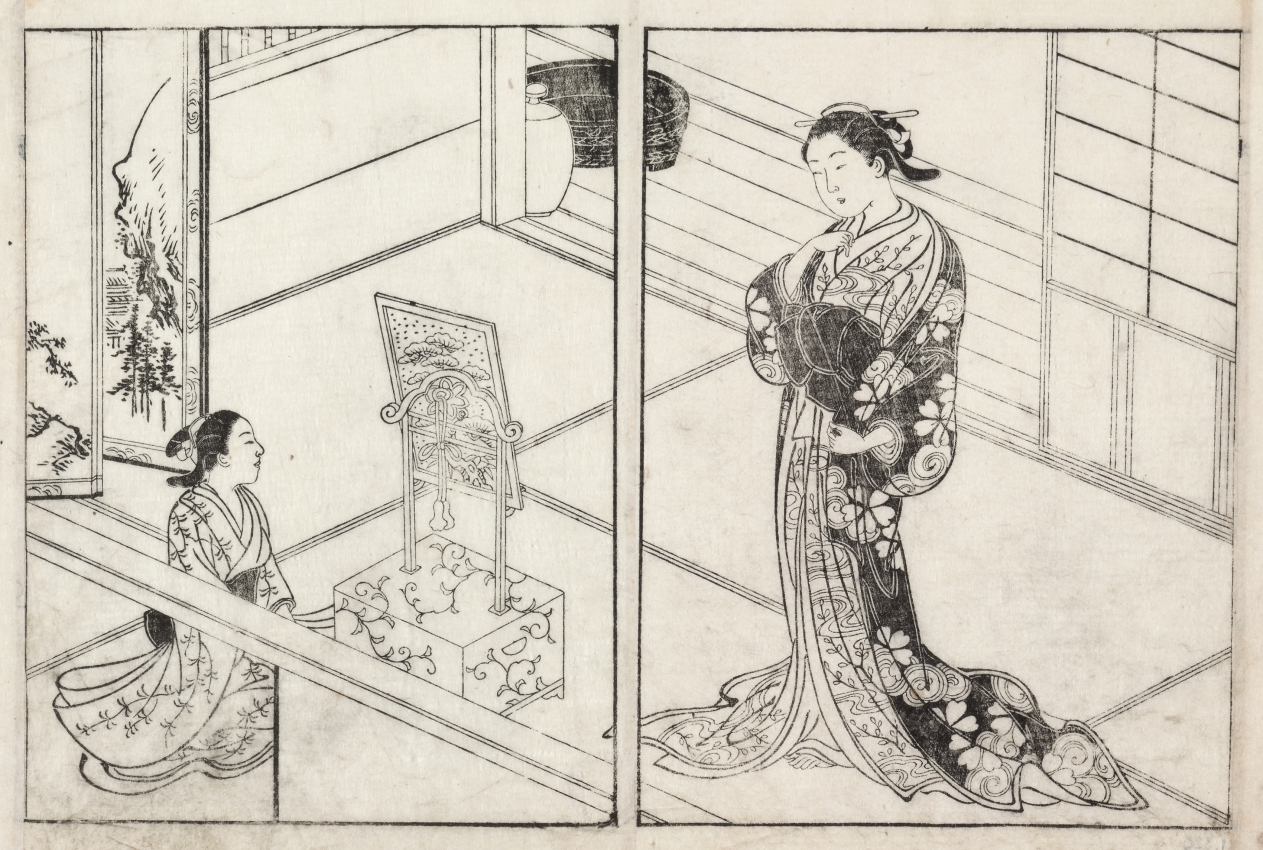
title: Woman and Child Beside a Mirror Stand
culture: Japan, Edo period (1615–1868)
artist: Nishikawa Sukenobu (Japanese, 1671–1754)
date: c. 1740s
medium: color woodblock print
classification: Print